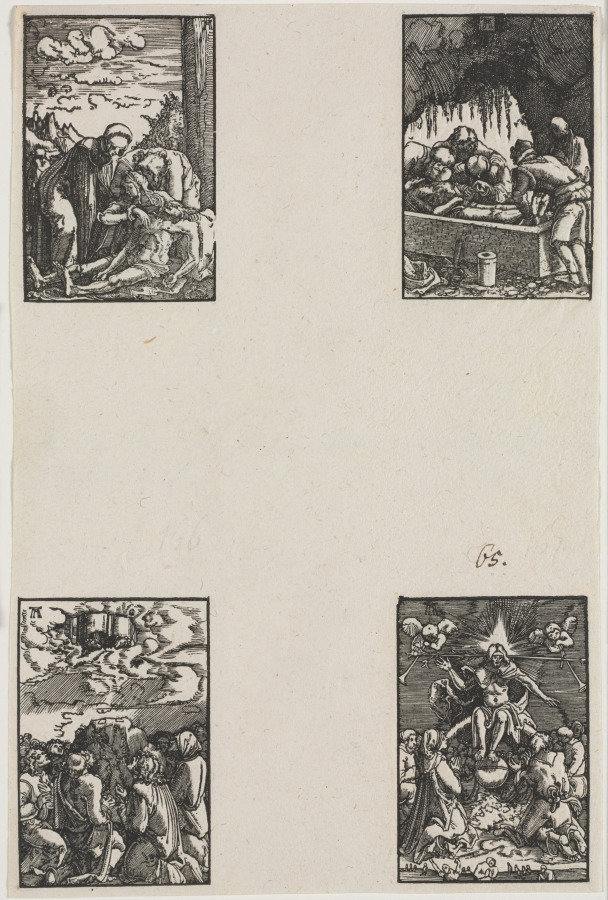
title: The Fall and Redemption of Man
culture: Germany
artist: Albrecht Altdorfer (German, c. 1480–1538)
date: c. 1515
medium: woodcut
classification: Print